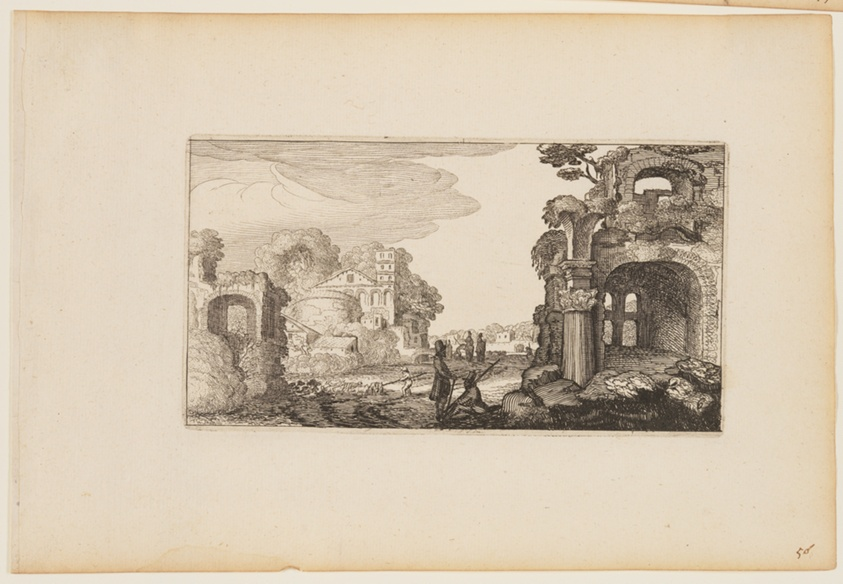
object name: Print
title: Path between Roman Ruins, from Twelve landscapes with Figures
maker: After Gillis van Scheyndel; Dutch, 1595–1660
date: 1624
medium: Etching on ivory laid paper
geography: Netherlands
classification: etching; paper; print; prints and drawing